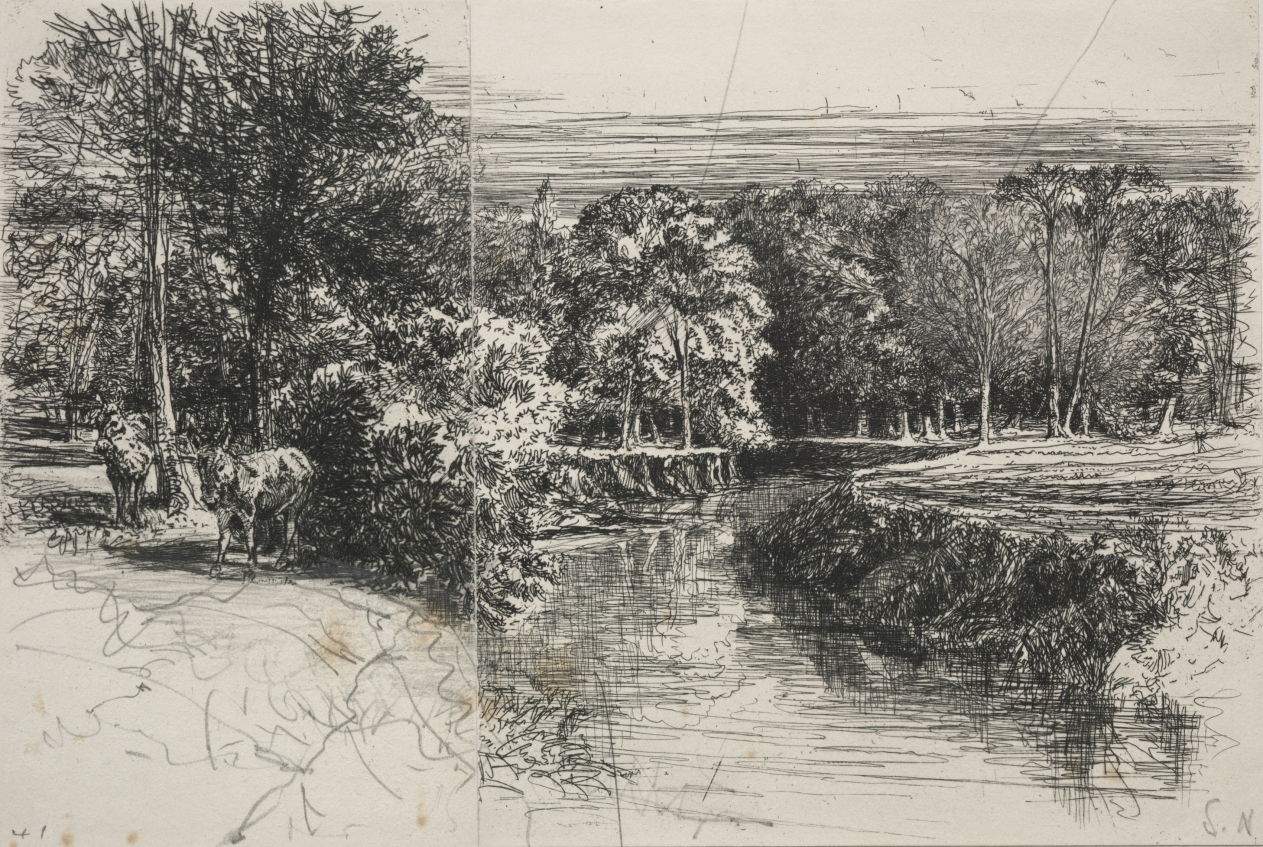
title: Dundrum River and the Two Asses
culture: England, 19th century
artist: Francis Seymour Haden (British, 1818–1910)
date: 1863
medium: etching with pencil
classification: Print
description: Francis Seymour Haden worked professionally as a surgeon, experimenting avidly with etching in his spare time. He took up the medium while it was experiencing a major revival of interest in London, and he quickly developed an artistic reputation that outweighed his medical work. Most of Haden’s prints were landscapes. In this work, work, he worked experimentally, combining two separate prints (from a plate that had been cut in two) and drawing on the image in graphite to further reconsider the composition.